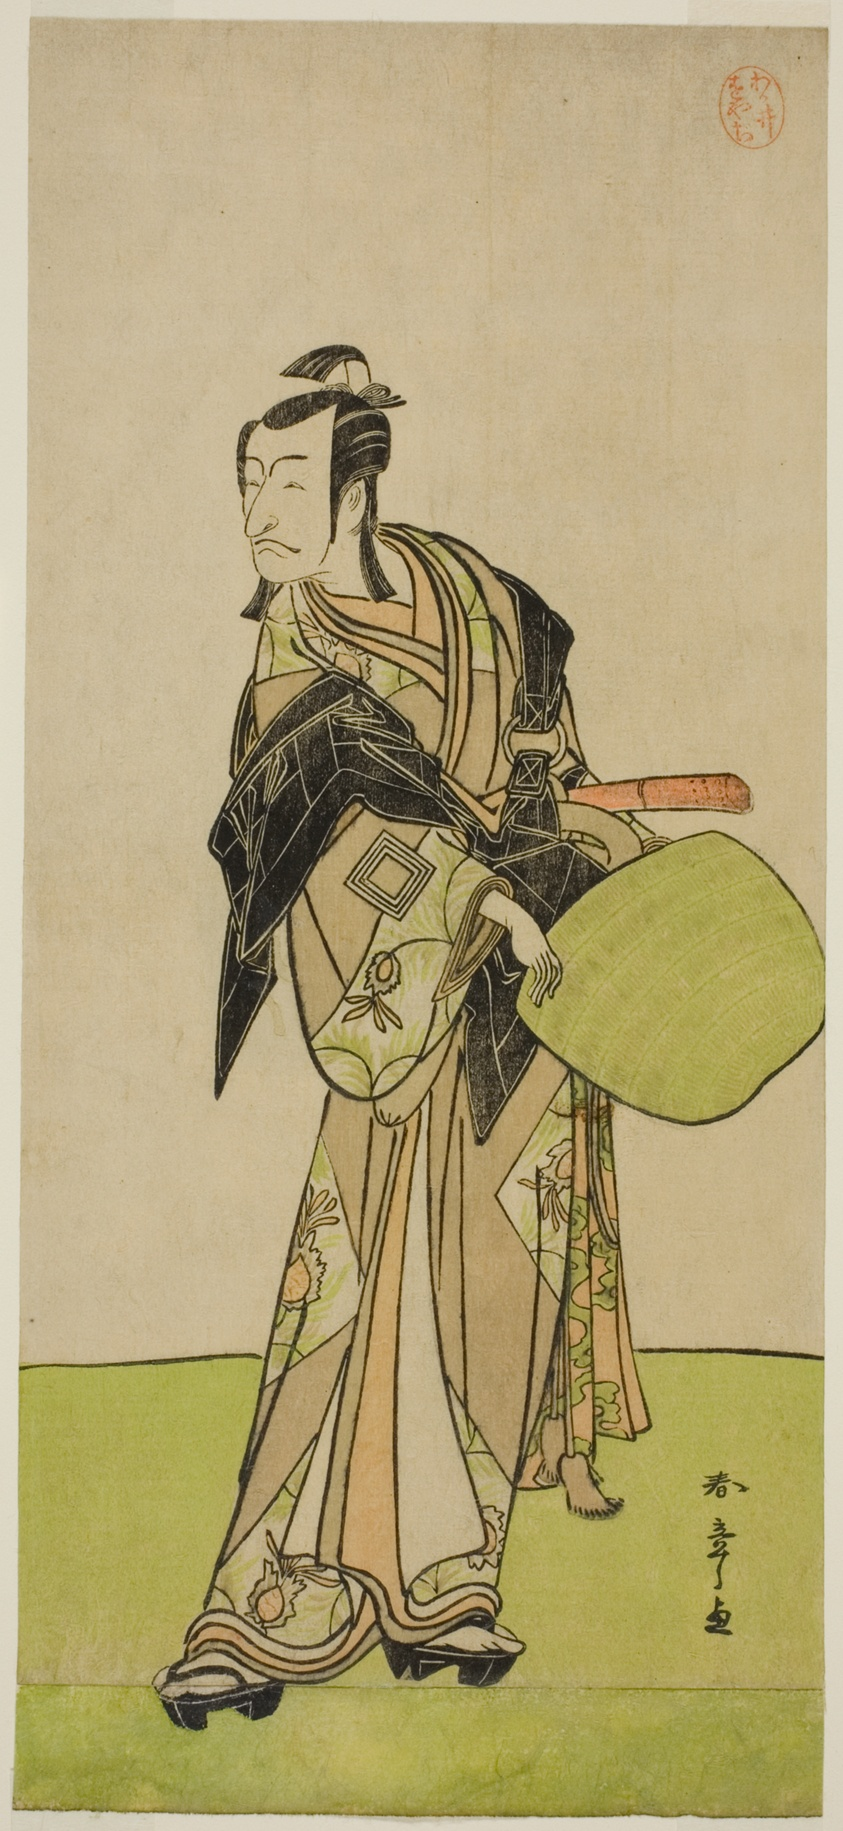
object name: Print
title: The Actor Ichikawa Danjuro V as Kakogawa Honzo in the Play Kanadehon Chushin Nagori no Kura, Performed at the Nakamura Theater in the Ninth Month, 1780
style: Japanese (culture or style)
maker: Katsukawa Shunsho 勝川 春章; Japanese, 1726-1792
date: c. 1780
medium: Color woodblock print; hosoban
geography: Japan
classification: woodblock print; print; asian art